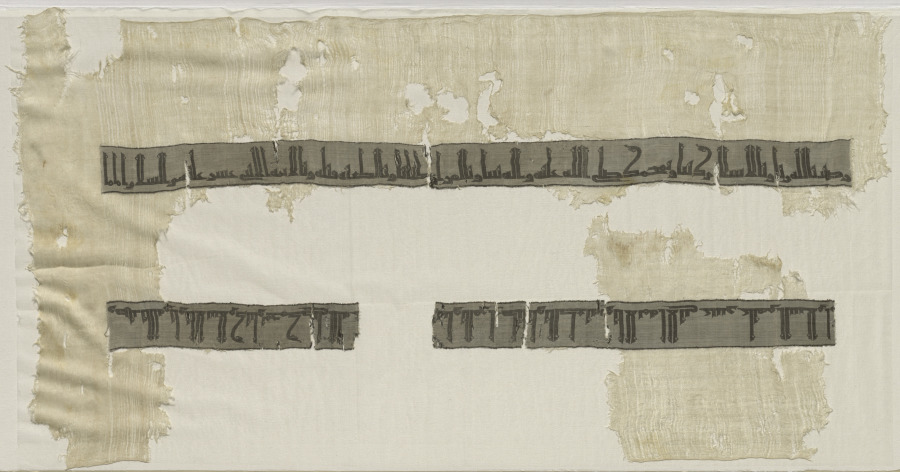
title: Fragment of Inscription Band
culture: Iraq or Iran, in the style of the Buyid period (945–1055)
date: before 1966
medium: compound tabby on tabby ground; silk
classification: Textile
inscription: two parallel inscription bands (1966.135 and 1982.299) with Kufic lettering in dark brown on a lighter brown ground run the warp direction of the cream colored textile with the lettering oriented at right angles to the warp: ". . . sallá Allah 'a[layhi wa-alihi] nabi(an in superscript) wa-bi-al-Qur'an kitab(an in superscript) wa-bi-al-Ka'bah [qiblat(an in superscript)] wa-bi-al-a' immah al-ithná 'ashar 'alayhim al-salam i[mam(an in superscript)]